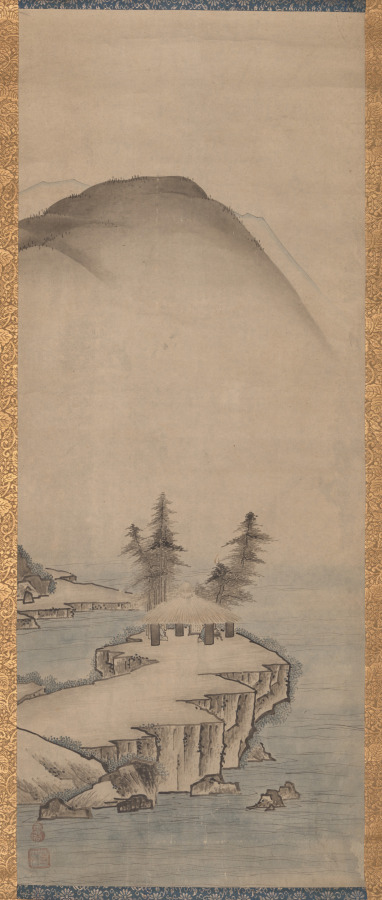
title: Landscapes (one of a pair)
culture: Japan, Edo period (1615–1868)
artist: Unkoku Tōyo (Japanese, 1612–1688?)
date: mid- to late 1600s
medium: hanging scroll; ink and light color on paper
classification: Painting